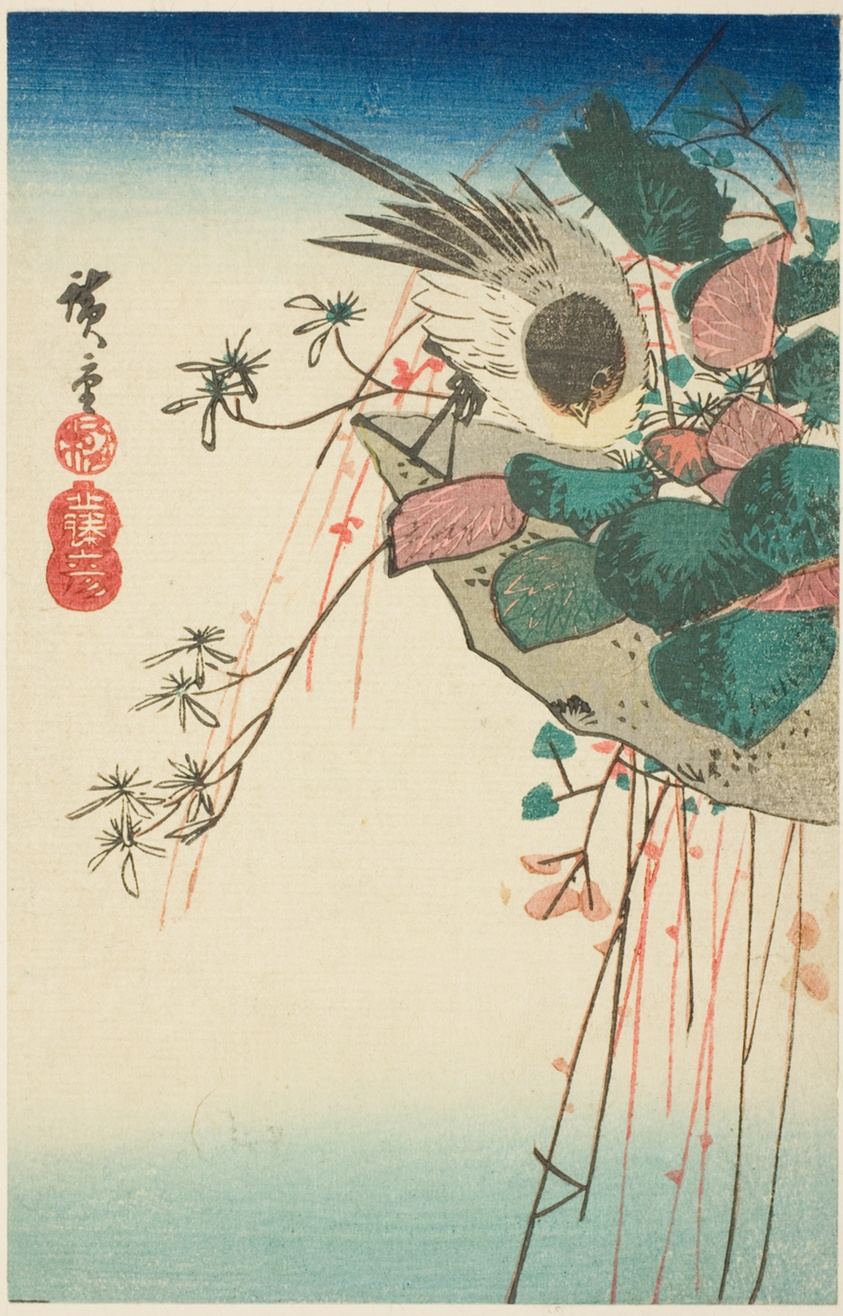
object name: Print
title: Sparrow on a hanging planter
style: Japanese (culture or style)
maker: Utagawa Hiroshige 歌川 広重; Japanese, 1797-1858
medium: Color woodblock print; yotsugiriban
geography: Japan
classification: woodblock print; print; asian art